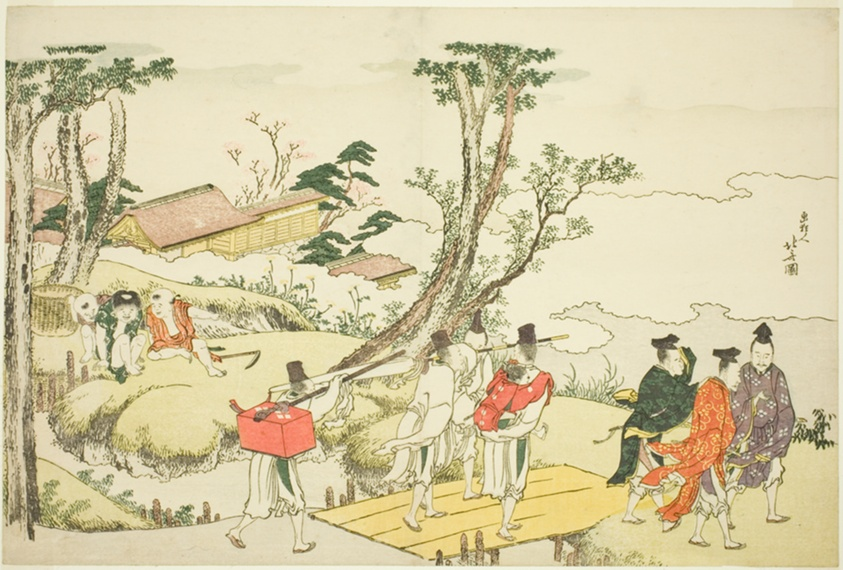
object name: Print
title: Frontispiece to the illustrated album "Thirty-six Immortal Women Poets" ("Nishikizuri onna sanjurokkasen")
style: Japanese (culture or style)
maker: Katsushika Hokusai 葛飾 北斎; Japanese, 1760-1849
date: 1801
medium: Color woodblock print; surimono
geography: Japan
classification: woodblock print; print; asian art